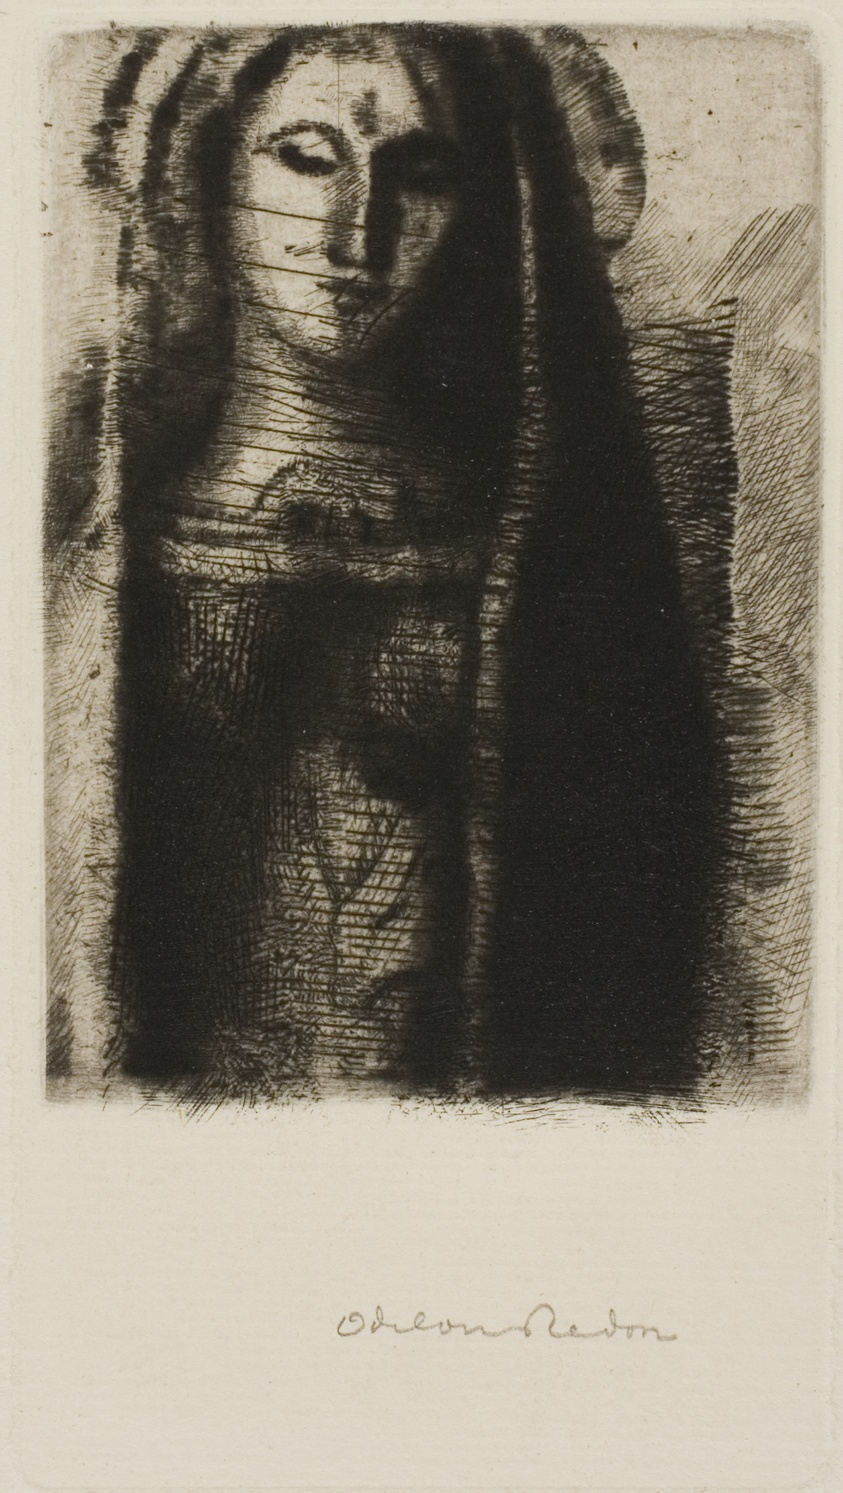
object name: Print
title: Princess Maleine (The Little Madonna)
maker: Odilon Redon (French, 1840-1916)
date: 1892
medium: Etching and drypoint on cream laid paper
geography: France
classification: etching; print; prints and drawing; paper